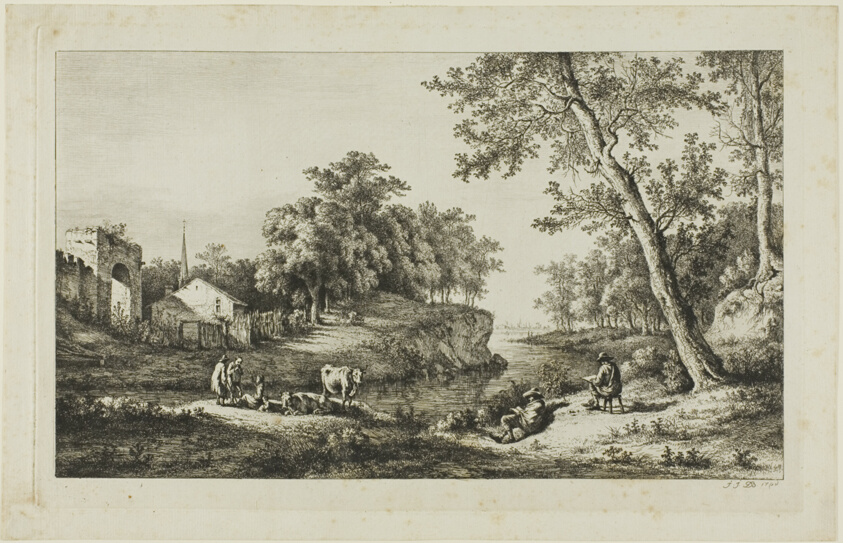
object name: Print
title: Rustic Landscape in Ambronay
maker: Jean Jacques de Boissieu (French, 1736-1810)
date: 1796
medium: Etching on paper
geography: France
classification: etching; print; prints and drawing